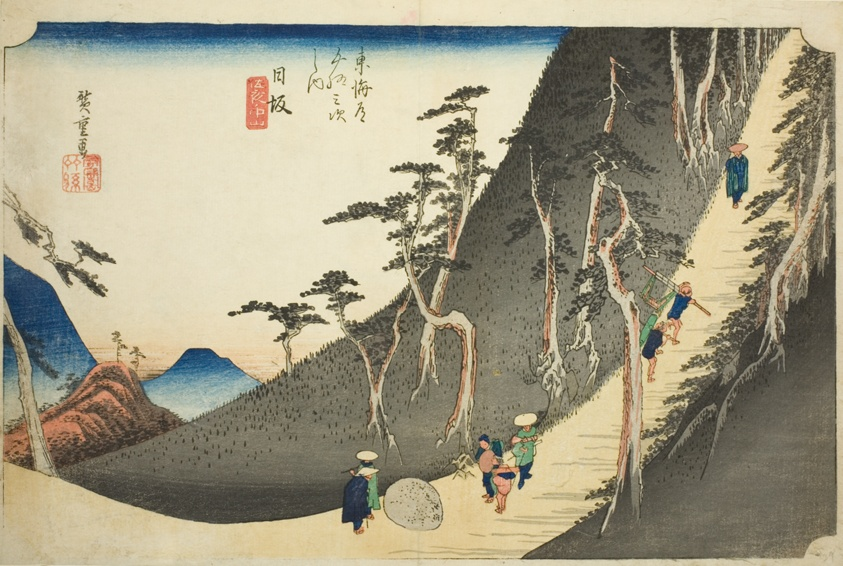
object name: Print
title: Nissaka: Sayo Mountain Pass (Nissaka, Sayo no nakayama), from the series "Fifty-three Stations of the Tokaido (Tokaido gojusan tsugi no uchi)," also known as the Hoeido Tokaido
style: Japanese (culture or style)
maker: Utagawa Hiroshige 歌川 広重; Japanese, 1797-1858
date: c. 1833/34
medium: Color woodblock print; oban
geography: Japan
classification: woodblock print; print; asian art